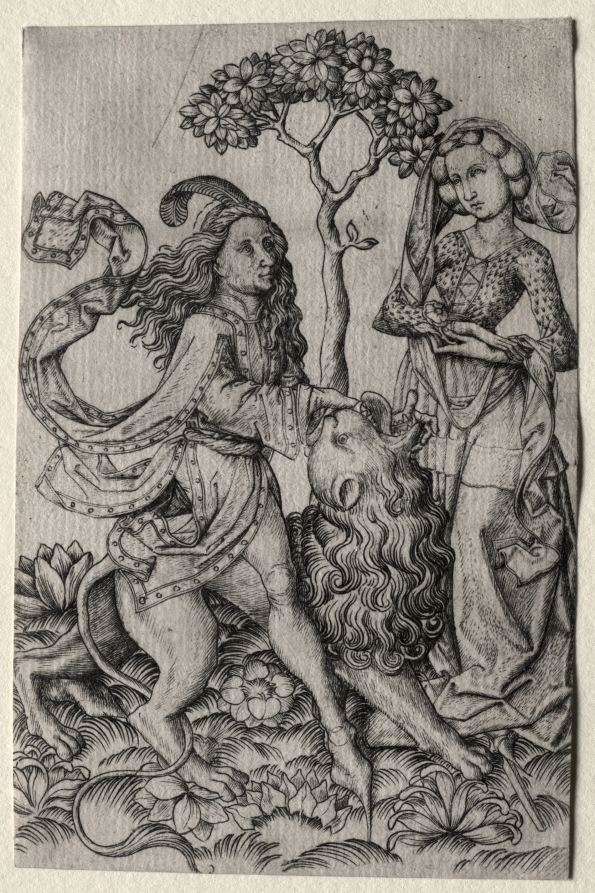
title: Samson Rending the Lion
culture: Germany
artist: Master ES (German, active 1450–67)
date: 1450–67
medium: engraving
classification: Print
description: The biblical hero Samson appears here as a fantastical medieval courtier, proving his courage and strength by slaying a lion with his bare hands. Viewers familiar with Samson’s story would have identified the courtly maiden as the woman of Timnah, a heathen who marries Samson, but betrays him during their wedding. The idea that even history’s greatest men succumbed to the power of women was a popular one in early prints.